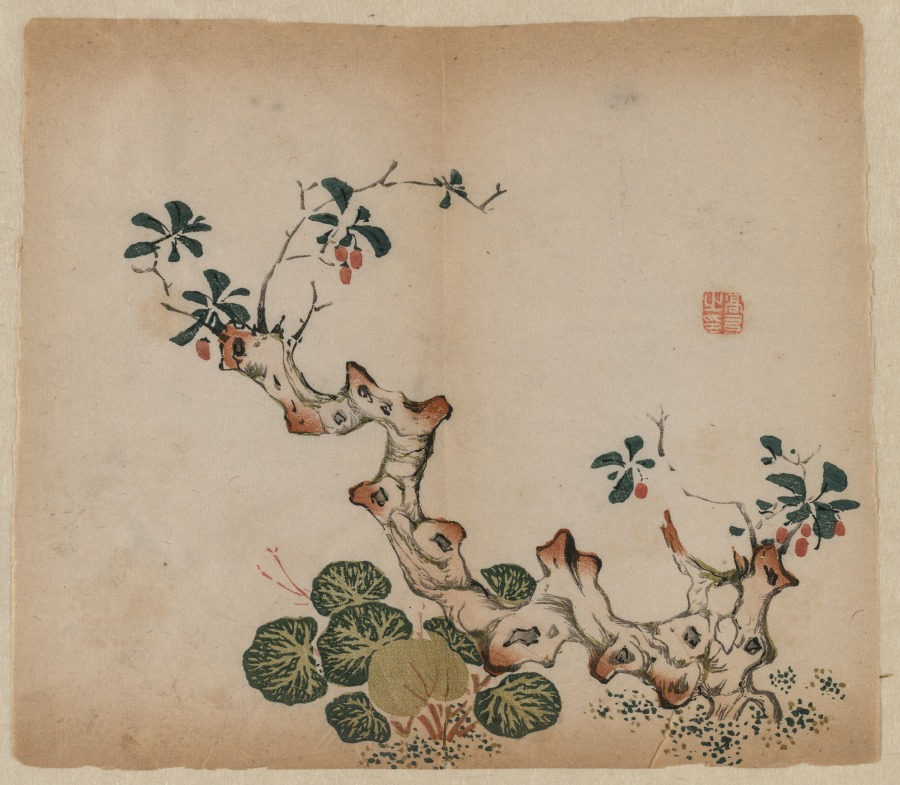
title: Branching Stump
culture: China, Ming dynasty (1368-1644) or later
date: 1368–1644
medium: color woodblock print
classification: Print